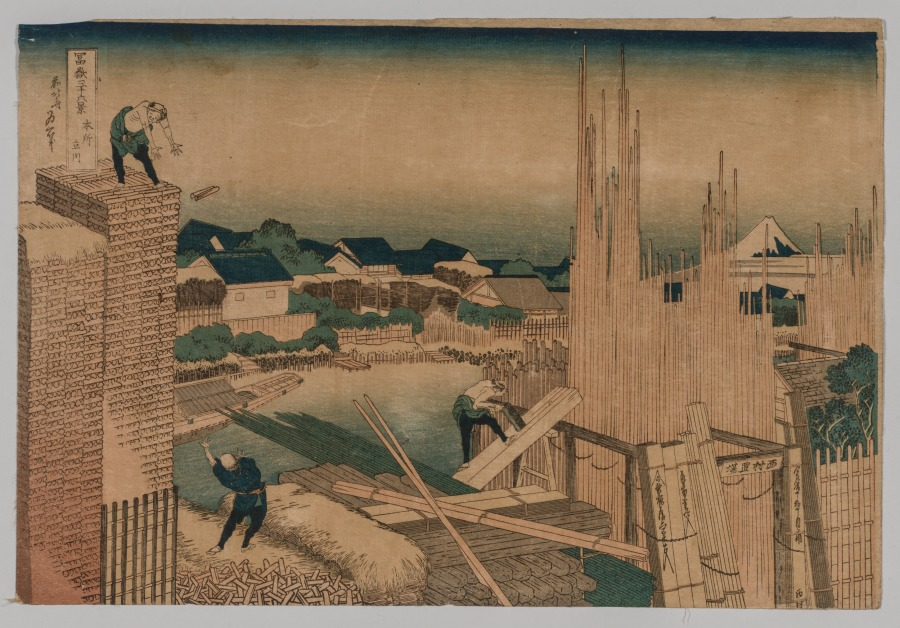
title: Lumber Yard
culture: Japan, Edo period (1615–1868)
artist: Katsushika Hokusai (Japanese, 1760–1849)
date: 1760–1849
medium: color woodblock print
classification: Print